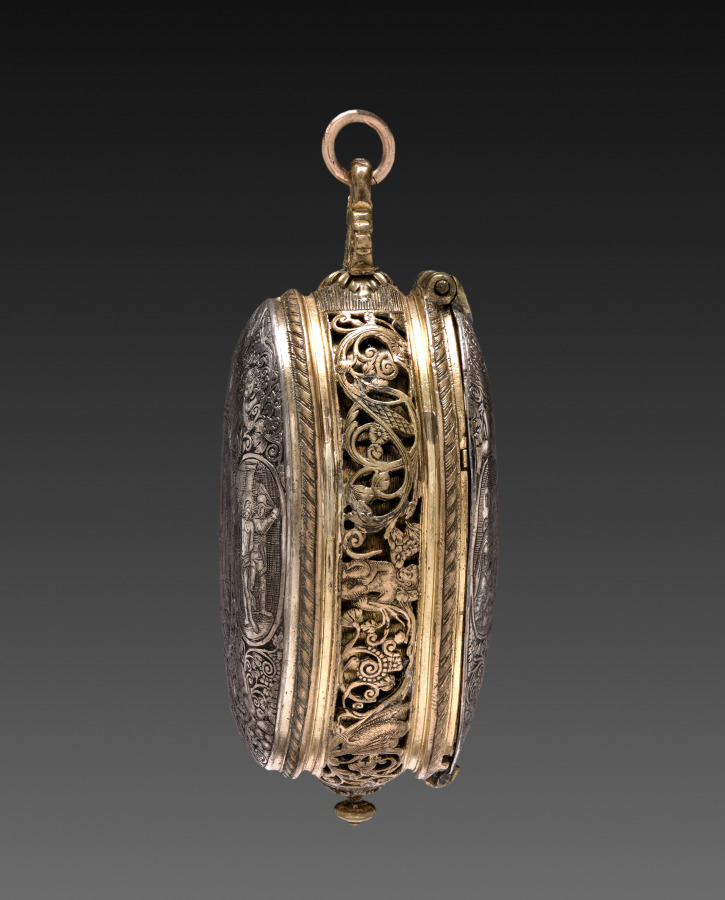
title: Engraved Egg Watch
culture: France, 16th century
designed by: Denis Martinot (French)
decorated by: attributed to Theodor de Bry (Flemish, 1528–1598)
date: 1590–1600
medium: silver, steel, and rock crystal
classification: Jewelry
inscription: inscribed: D. Martinot, Paris.